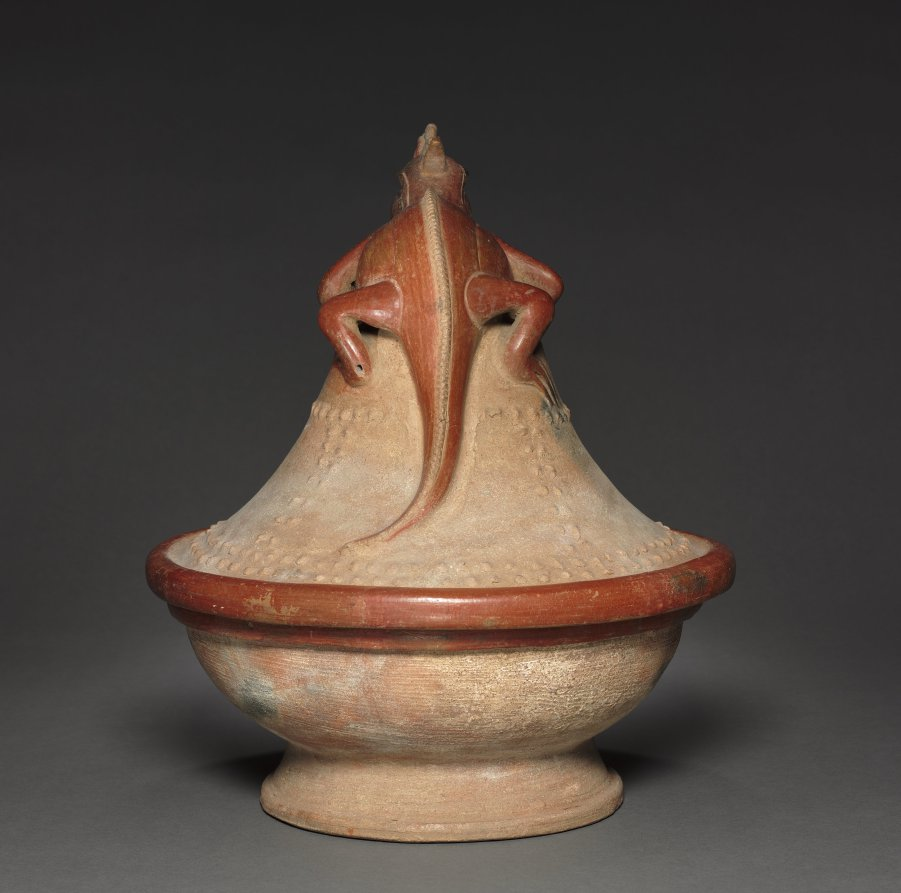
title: Lidded Bowl with Iguana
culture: Costa Rica, Southern Nicoya region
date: c. 600–1100 (Thermoluminescence date, 995–1395)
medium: ceramic, slip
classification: Ceramic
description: At the time of the Spanish conquest in the 16th century, Costa Rican mythology linked iguanas to the sky and to rulers. The earlier makers of this vessel left no written records, but they may have had similar beliefs. The lizard poses as though basking in the sun, a celestial body, and assumes an aggressive stance that could be likened to a ruler's: the teeth and chin under the dewlap are displayed, Also, fine ceramics like this were buried in the graves of the high-status dead, some of them certainly leaders of the several groups that competed in the area.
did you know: Green iguanas can grow to be over 6 feet long.